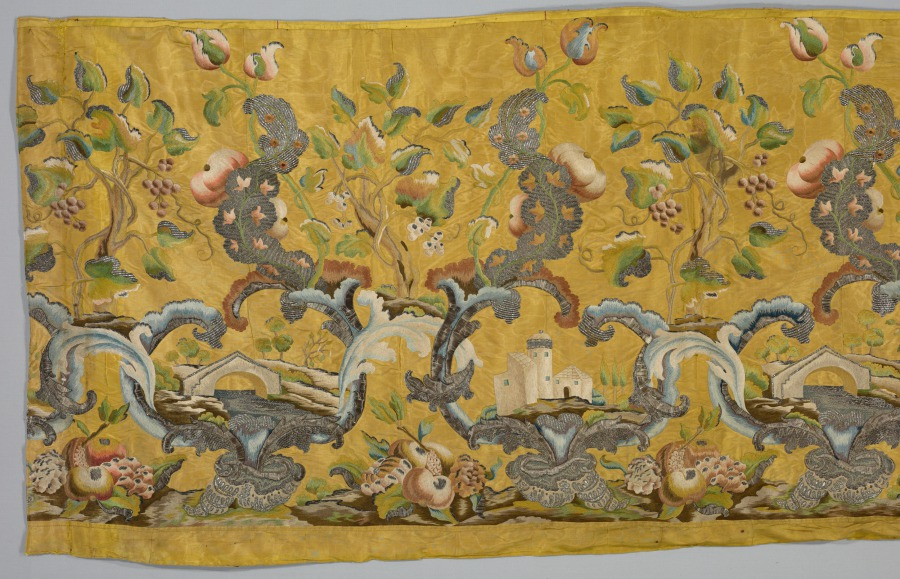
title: Embroidered Band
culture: Italy, 18th century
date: 1700s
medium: embroidery; silk and metallic threads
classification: Embroidery